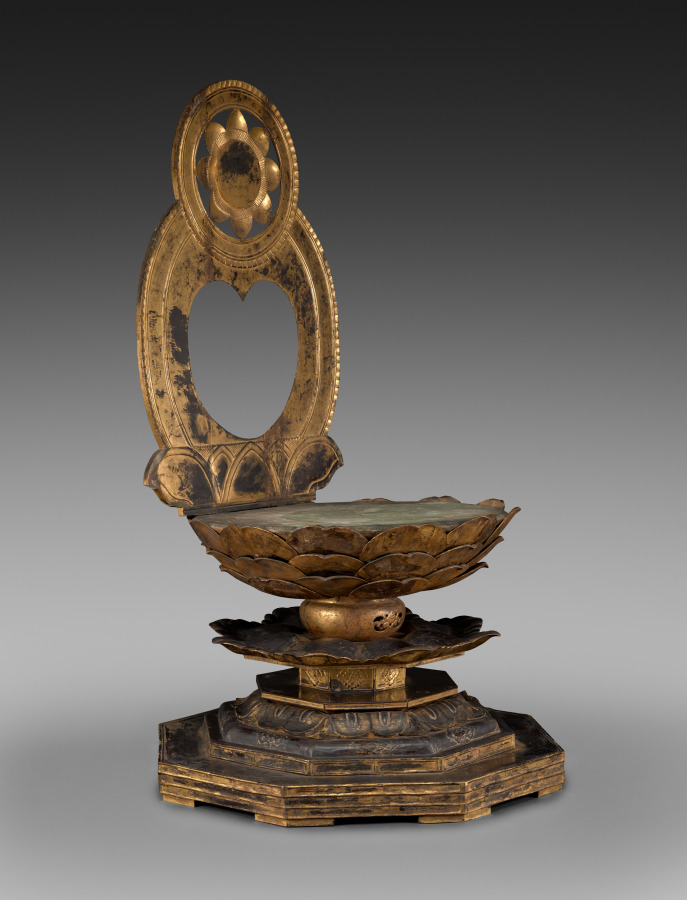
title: Seated Buddha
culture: Japan, Heian period (794–1185)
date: 1100s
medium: gilded wood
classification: Sculpture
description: Composed of a number of hollowed-out pieces of wood that were then covered with lacquer and gilding, this sculpture served as an image of worship in one of the small temples surrounding Kōfukuji, a major Buddhist temple in Nara, Japan. Like many Buddhas, this figure has its right hand positioned in a gesture meaning "fear not." The left hand is a replacement, so its original gesture, a clue to this Buddha's identity, is unknown. However, as the left foot is exposed over the garment, in lotus position, it may have been created as a Medicine Master Buddha, Yakushi Nyorai in Japanese, or the Buddha of our era, Shakyamuni.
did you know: A 1906 photo taken at Kōfukuji shows this sculpture without a halo or left hand.